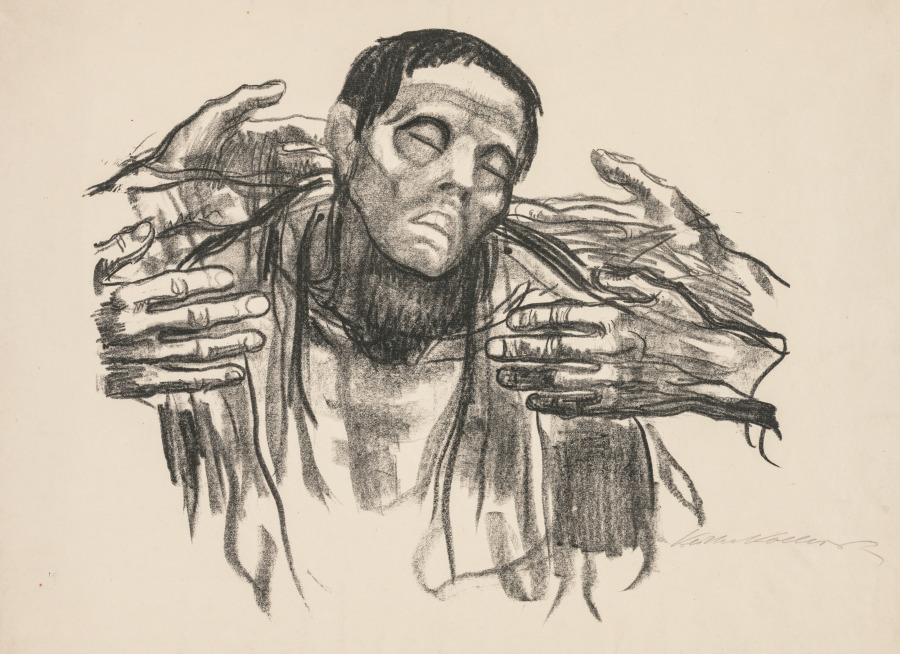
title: Help Russia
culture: Germany, 19th-20th century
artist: Käthe Kollwitz (German, 1867–1945)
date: 1921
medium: lithograph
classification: Print